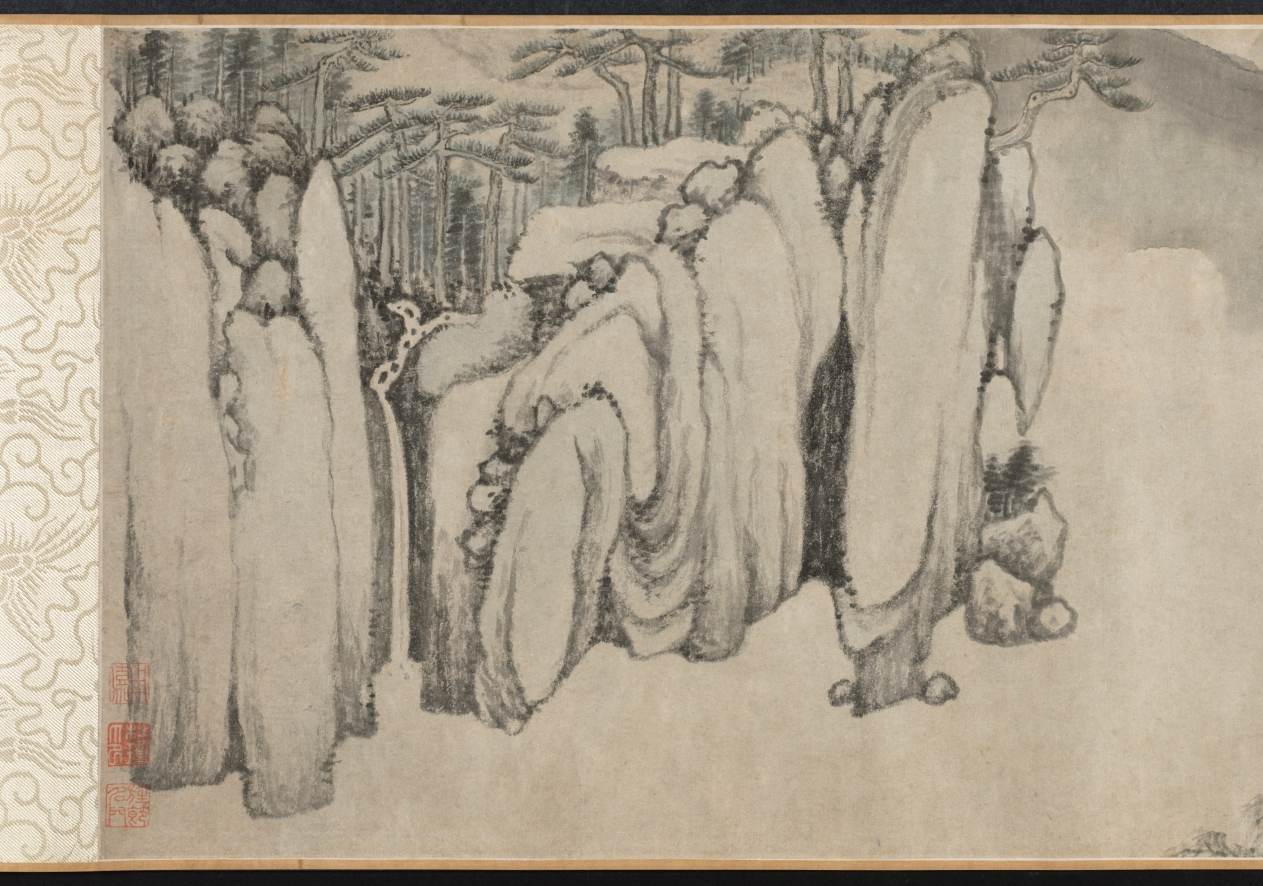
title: Mt. Taibo in the Style of Wang Meng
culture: China, Ming dynasty (1368–1644)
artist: Du Qiong (Chinese, 1396–1474)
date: 1442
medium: handscroll; ink and light color on paper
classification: Painting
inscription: Artist's inscription, signature, and 11 seals: [1 seal] Tung-yüan chai. Huang-ho-shan-ch'iao [Wang Meng] painted a painted called T'ai-po Mountain. Its brushwork is superior and admirable, which is very close to Yu-ch'en [Wang Wei, 699-759]. The cleverness of its composition, the maple groves and rustic temples, the inaccessible ravines and autumnal plateaus, the periolous peaks and strange rocks, etc., all seem to be so natural. The paper is only a little over eight feet, but the landscape has the range of a thousand miles. Once you open and note the contents, it is as if one were roaming among the mountain peaks enveloped in mist and clouds, and forgot the dusty world. When I first saw this, I was so mixed with excitement and joy that I could not take my hands off the painting. So I put it on the table, and tried my best to imitate it, forgetting sleeping and eating for about three months before it was completed. Although I do not dare to tread in the footsteps of Huang-ho shan ch'iao, I took great pains to capture his spirit in composition and colors. I do not know whether it would pass the judgment of the experts. On the fifteenth day of the fifth month, the seventh year of the Cheng-t'ung year [1442], inscribed by Tung-yüan, Tu Chiung. [2 seals] Yung-chia; Ching-chieh ming-men. [8 seals on painting] Tung-yüan chai; Ching-chieh ming-men; Yung-chia; Tu Ch'iung yin; Tung-yüan (repeated 5 times). trans. WKH/LYSL 3 colophons and 7 additional seals: 1 colophon and 2 seals of Chou Ting (1401-1487); 1 colophon and 2 seals of Wu K'uan (1435-1504); 1 colophon, dated 1655, and 2 seals of Lan Ying (1585-after 1664).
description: When a Chinese painter "imitated" a painting by a past master, the intention was never to produce an exact copy. Du Qiong, the Ming painter from Suzhou, is a case in point. The painting style of this handscroll is actually closer to that of Huang Gongwang (1269–1354) than to the style of Wang Meng (about 1301–1385). Both masters were active during the previous dynasty and are among the so-called Four Great Masters of the Yuan dynasty (1279–1368). In this painting, the interplay of styles, including Du Qiong's own, contribute to an inner dimension that is more than visual. Mt. Taibo is located in the province of Zhejiang and is known for its scenic beauty. In this scroll, however, it is not depicted literally. The image is an ideal representation of mountains in southeastern China.